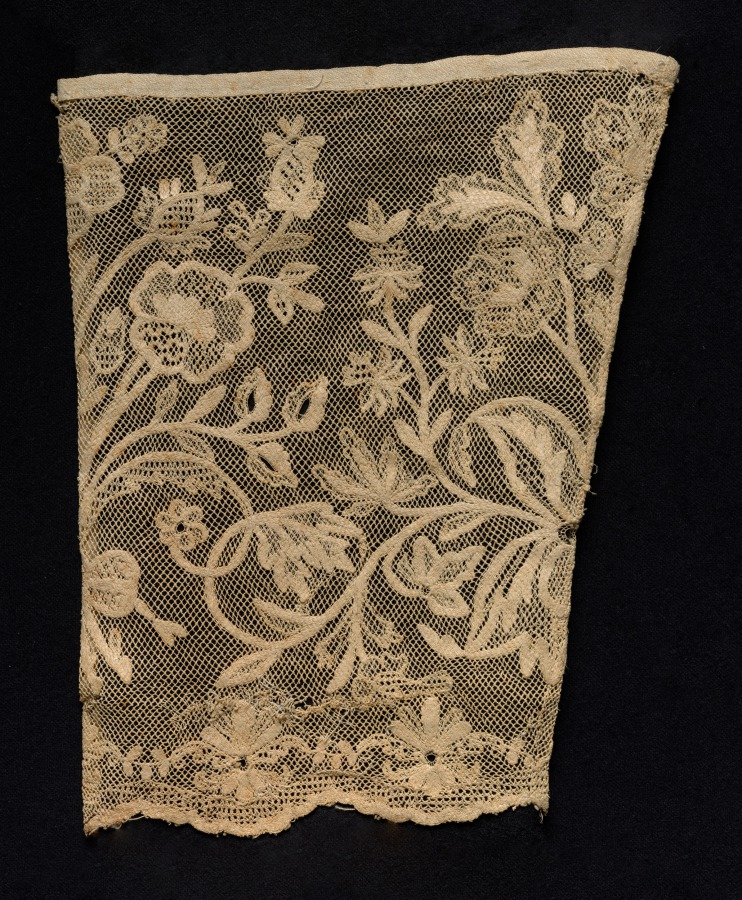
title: Cuff with Floral Vines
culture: Unassigned, 1800s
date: 1800s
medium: Bleached linen (est.): needle lace, filet/lacis (knotted ground and darned in one direction)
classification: Lace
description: In this lace cuff (one of a set, see 1936.225), scrolling vines with budding flowers emerge from a tied bow, creating a stylized bouquet. A scrolling vine with budding vegetation or a tendril motif is a recurring pattern in needle lace. The frequent use of the motif, adapted in lace from different centuries and regions, suggests that it was found in a pattern book.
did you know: From the 15th century, lace cuffs were among the most popular ways to wear and display this costly textile.